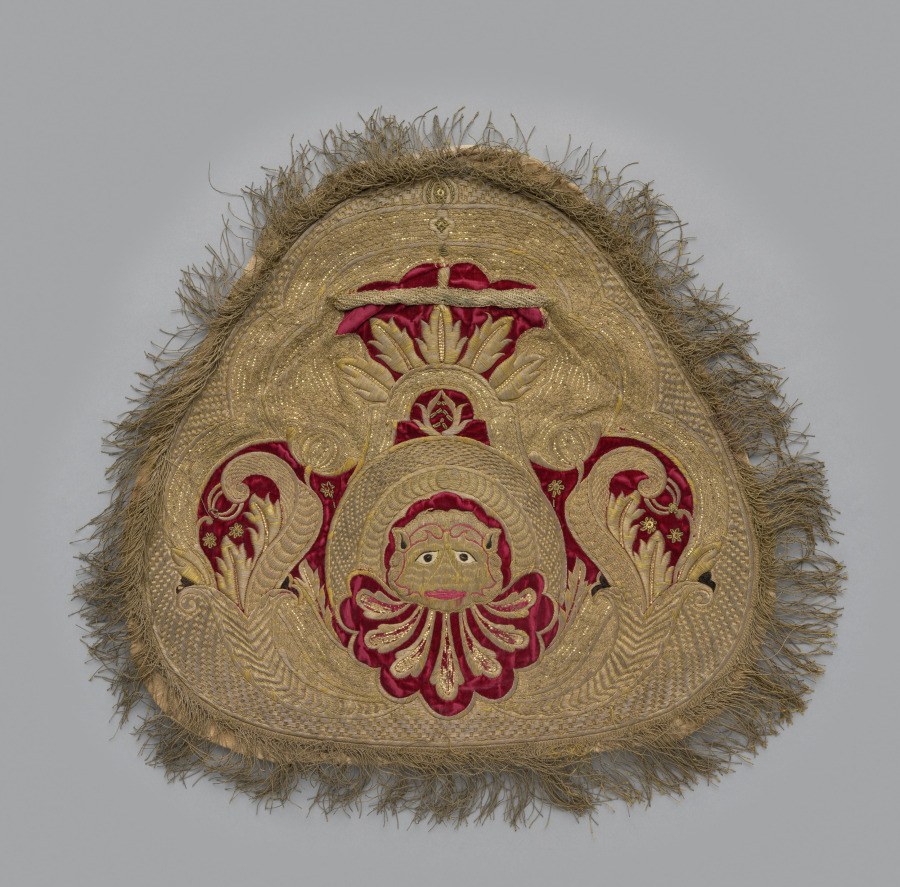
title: Gold Embroidered Pistol Cover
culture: Spain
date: 1700s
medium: embroidery; gold metallic thread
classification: Embroidery